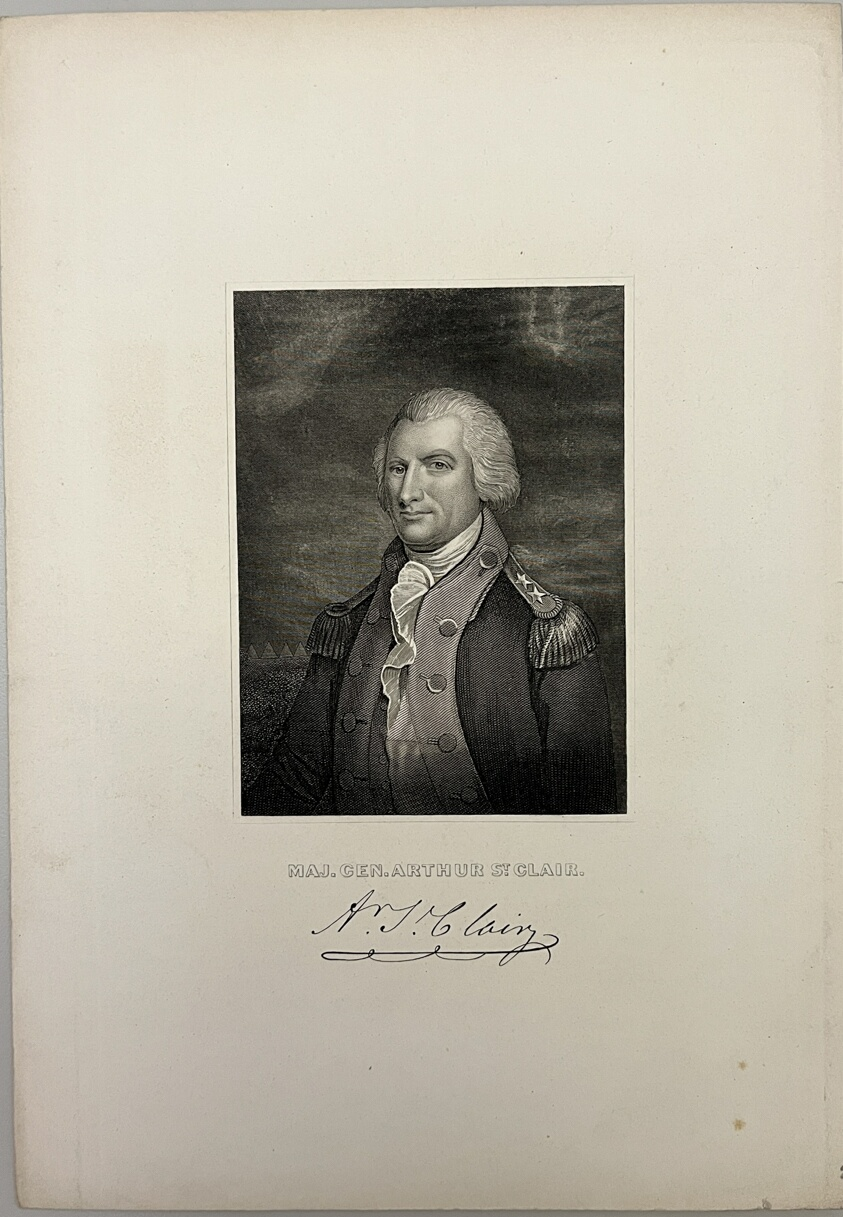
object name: Print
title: Major General Arthur St. Clair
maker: Artist Unknown (Likely American, 19th century); after Edward Wellmore (American, active mid-19th century); after James Barton Longacre (American, 1794-1869); after Charles Wilson Peale (American, 1741-1827)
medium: Etching on paper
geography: United States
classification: reproduction; print; prints and drawing